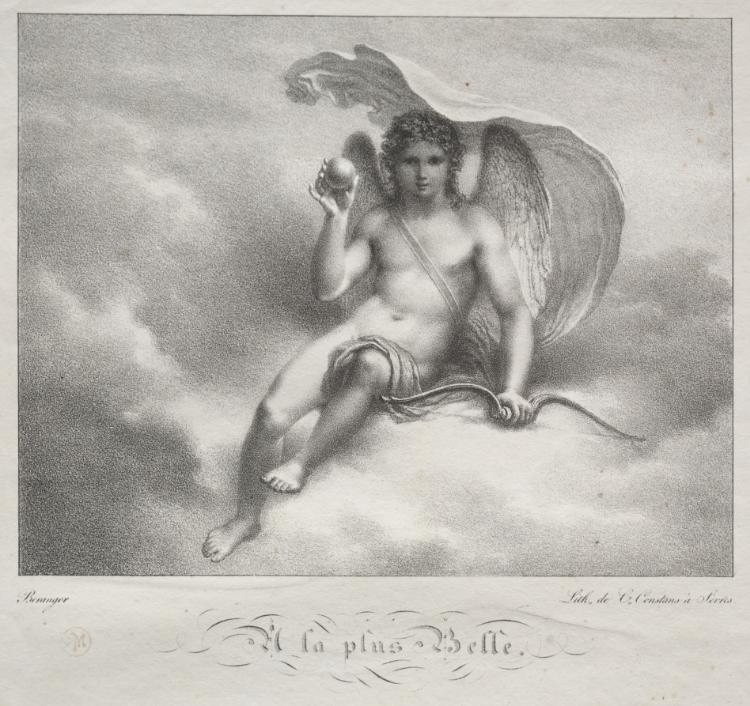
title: À la plus belle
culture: France, 19th century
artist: Antoine Béranger (French, 1785–1867)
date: 1800s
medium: lithograph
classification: Print